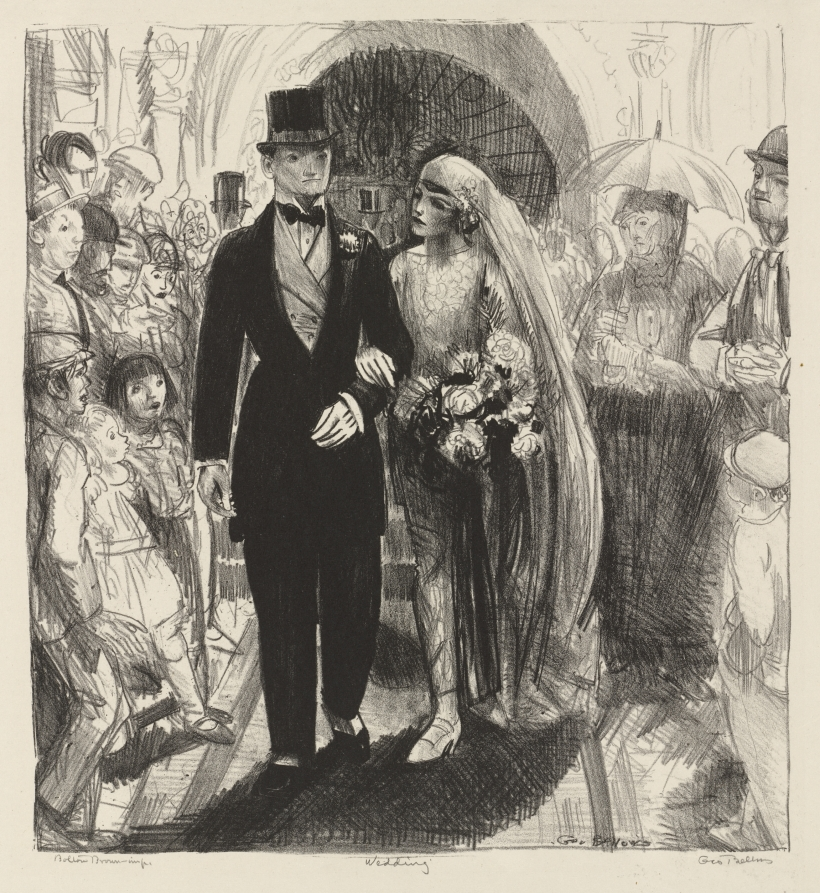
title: Wedding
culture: America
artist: George Bellows (American, 1882–1925)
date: 1924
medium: lithograph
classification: Print